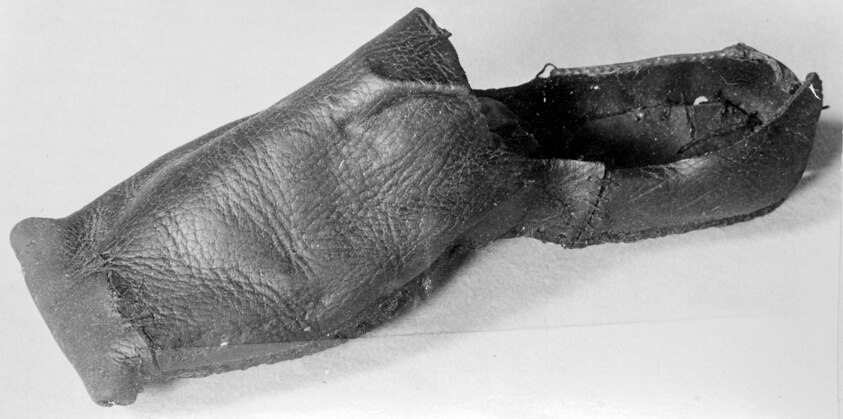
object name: Costume and Accessories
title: Man's Horned Toe Shoe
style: tudor, european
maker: England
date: 16th century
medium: Leather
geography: England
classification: textile; costume accessory - shoe; shoes - misc; costume; dress (garment); clothing